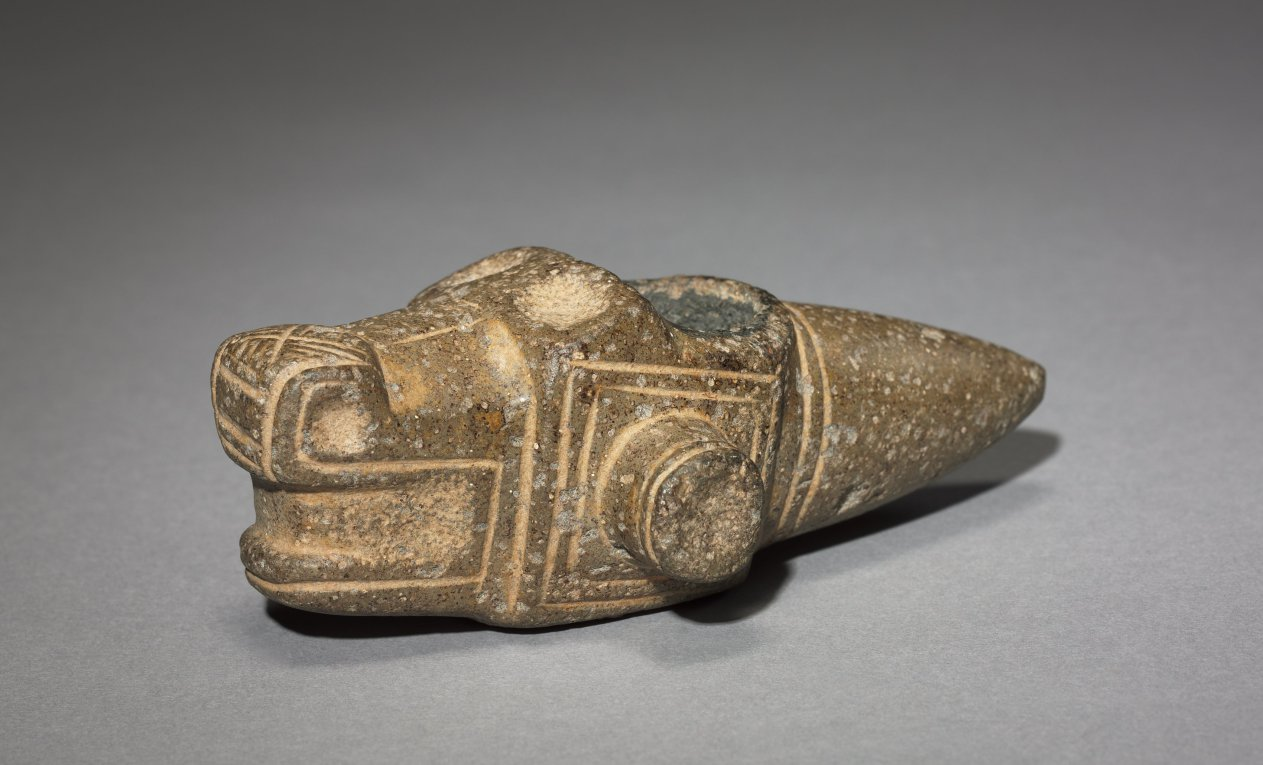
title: Mace Head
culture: Costa Rica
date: 300–500 CE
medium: pecked and polished gray stone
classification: Sculpture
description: Once mounted on wooden shafts, elaborately shaped mace (club) heads like this one probably were not used as weapons. Rather, they could have served as emblems of chiefly authority, group insignia, the heads of ceremonial weapons, or all three. They eventually were placed in elite graves. The back-curled nose on this example may refer to a crocodile or caiman.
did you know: In ancient Costa Rica, it was believed that the world rested on the back of a crocodile.